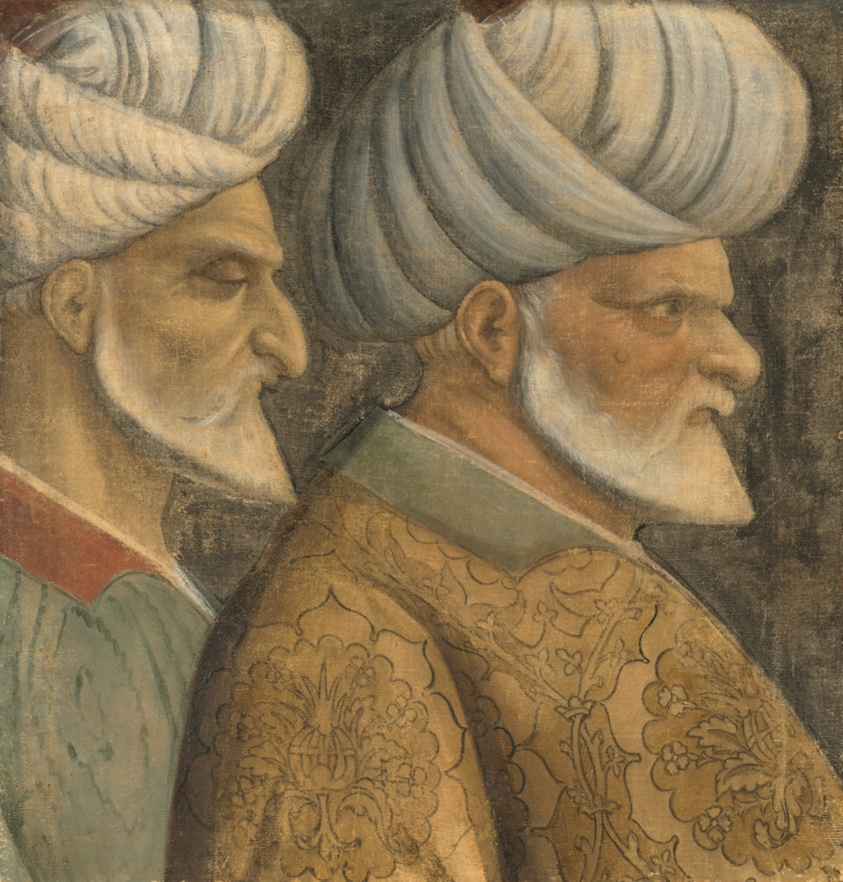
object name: Painting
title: Sinan Reis and Hayreddin Barbarossa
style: 16th Century, Renaissance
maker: Italian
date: c. 1535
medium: Tempera on canvas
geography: Northern Italy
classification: tempera; Italian; paint; painting; european painting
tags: portraits: multiple subjects, profile, man, men, islamic, Jewish people, portrait, portraits: male subject, Century of Progress, world's fairs, Chicago World's Fairs